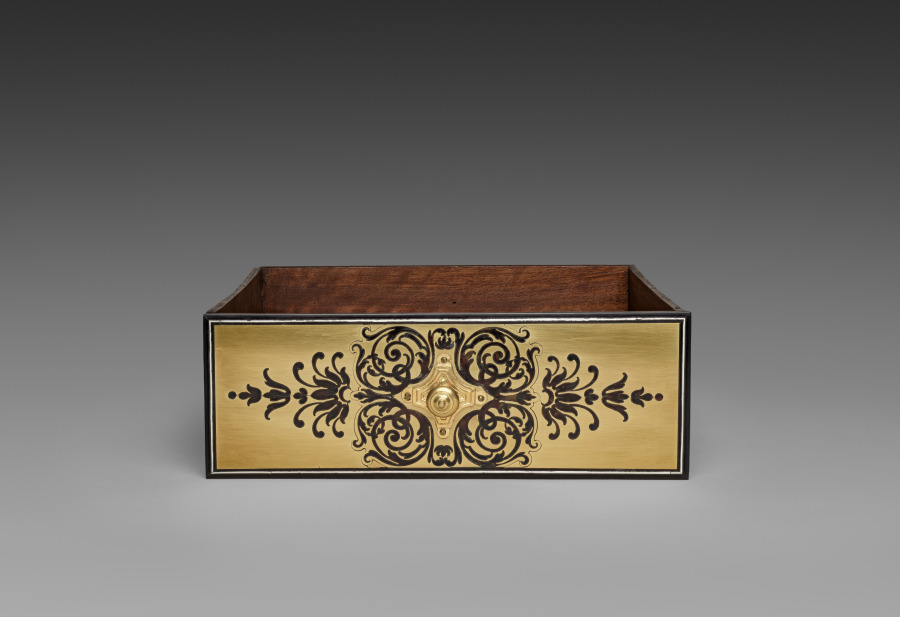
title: Interior Drawer for Cabinet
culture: France, late 17th Century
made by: André-Charles Boulle (French, 1642–1732)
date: c. 1690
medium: ebony, marquetry in metal and tortoise shell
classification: Furniture and woodwork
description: Appointed cabinetmaker to King Louis XIV in 1672, André-Charles Boulle became a master of furniture making in France during the late 1600s until his death in 1732. Known primarily for his use of marquetry, in which metal patterns are inlaid into tortoiseshell then applied within the veneered surface of the furniture, Boulle established a level of quality and craftsmanship few others could achieve. As a result, his work found favor at the royal court and among other aristocrats and diplomats eager to impress the king. The inclusion of a medallion depicting Louis XIV within the bronze decoration of this chest would have identified the owner with the royal court. Often exhibiting stout architectural proportions with elegant groups of inlaid motifs such as the parrot on the central panel of this chest, Boulle’s designs are an example of the intellectual fashion for contrasting ideas, materials, and motifs.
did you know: Originally designed to sit atop an elaborate tall stand, this chest was likely altered in the late 1700s to reduce its scale and height.